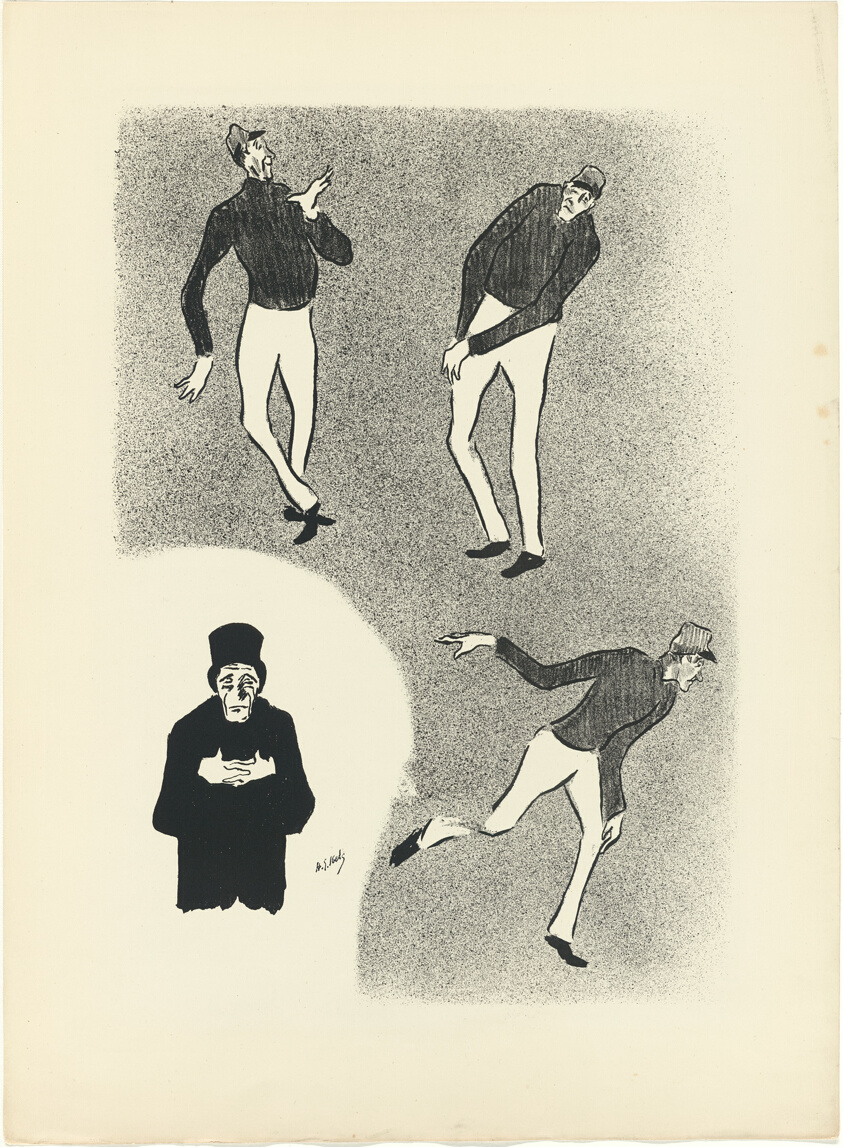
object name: Print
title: Ouvrard, from Le Café-Concert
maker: Henri-Gabriel Ibels (French, 1867-1936); printed by Edward Ancourt & Cie (French, 19th-20th century); published by L'Estampe originale (French, 1893-1895)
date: 1893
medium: Lithograph on cream wove paper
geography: France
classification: lithograph; print; prints and drawing